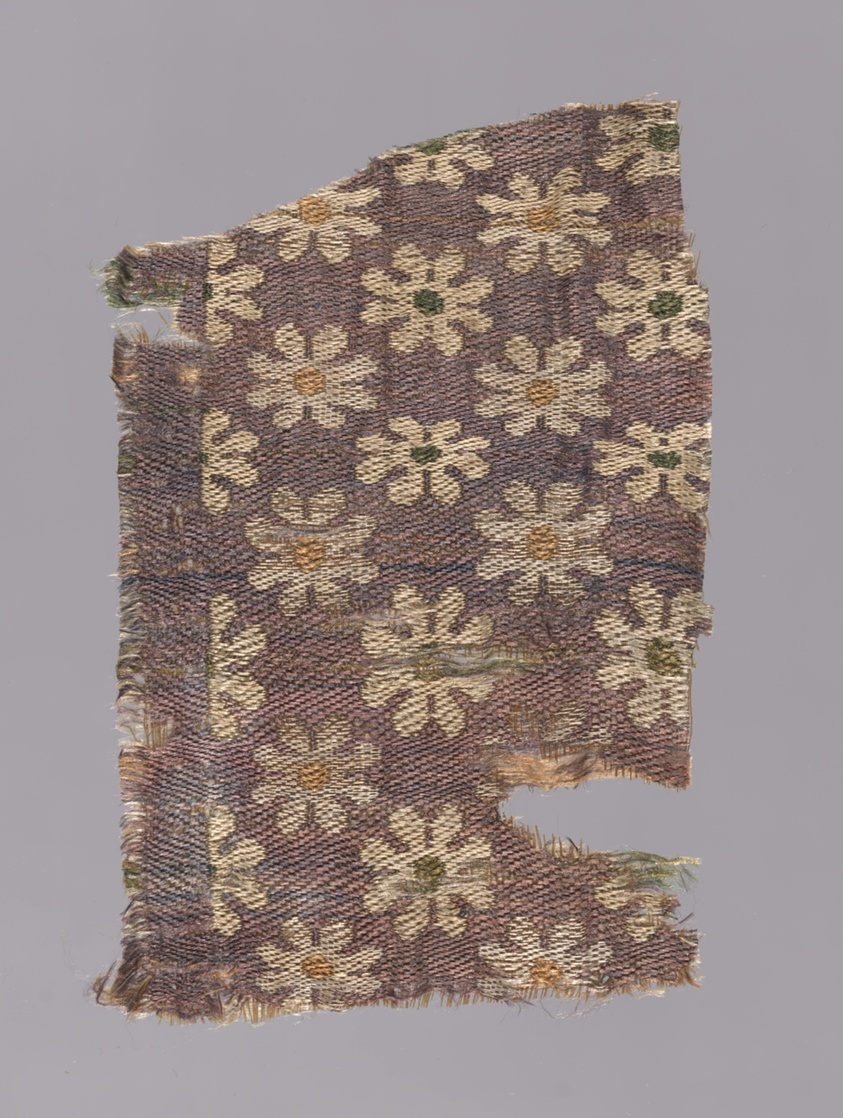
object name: Textile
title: Fragment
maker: Possibly France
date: 15th century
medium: Silk, three color complementary weft weft-float faced twill weave with inner warps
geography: France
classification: textile; weaving